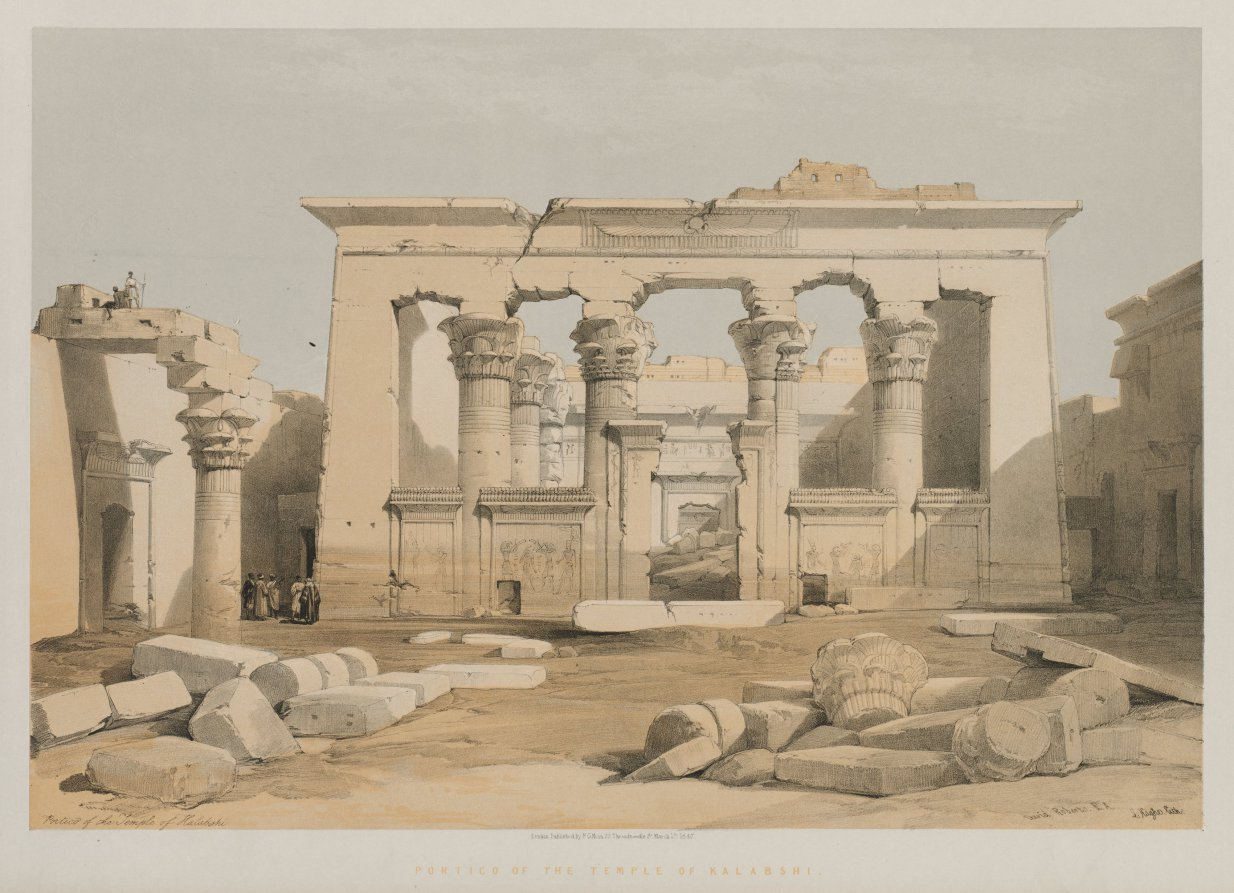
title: Egypt and Nubia, Volume I: Portico of the Temple of Kalabshe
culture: England, 19th century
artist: Louis Haghe (British, 1806–1885)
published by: F. G. Moon, 20 Threadneedle Street, London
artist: after David Roberts (Scottish, 1796–1864)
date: 1847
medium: color lithograph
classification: Print